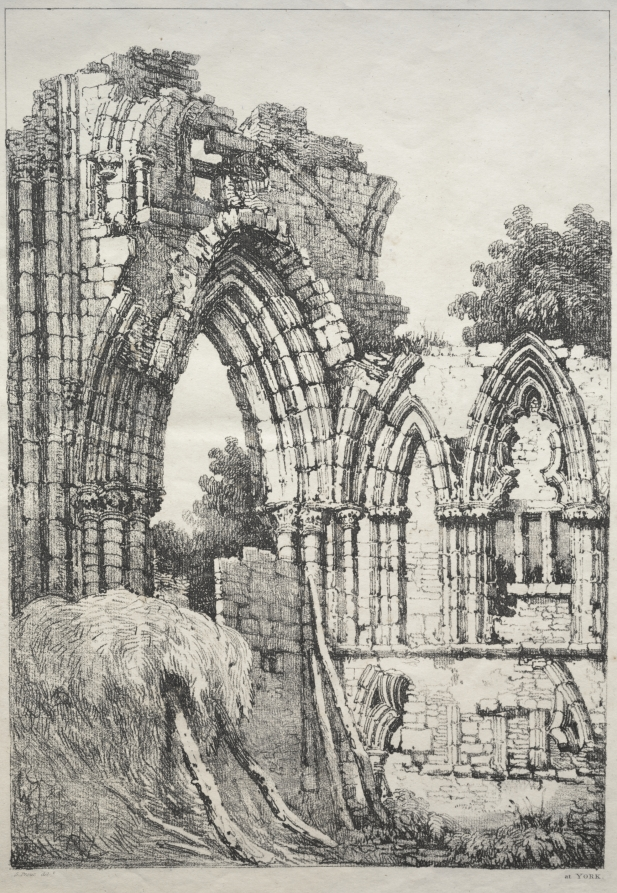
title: A Series of Ancient Buildings and Rural Cottages in the North of England: At York, Ruins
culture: England, 19th century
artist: Samuel Prout (British, 1783–1852)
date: 1821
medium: softground etching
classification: Print